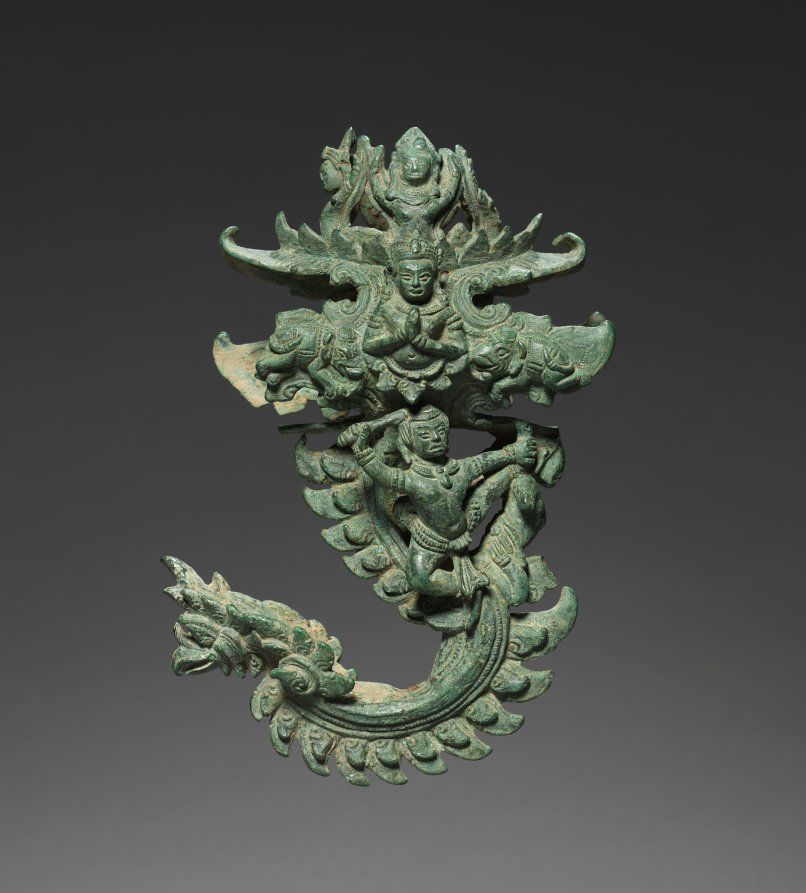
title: Palanquin Hook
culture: Cambodia, probably Angkor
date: 1175–1230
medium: bronze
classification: Sculpture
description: When members of the royal family or priesthood traveled in a public festival procession or to a temple to make offerings or participate in a ceremony, they would be carried in a palanquin, or a covered litter. Portable objects of veneration, such as bronze images or a sacred fire, were also carried on palanquins. The palanquins had wooden poles, hanging seats or raised platforms, and bronze fittings cast in intricate forms and gilt, lending the palanquins a sumptuous quality. This hook once supported a bronze ring from which hung a seat, like a hammock or swing. A wooden pole would have passed through the hollow socket at the top and was carried on the shoulders of bearers. The hook segment ends in the face of a garuda, a man-eagle with a prominent beak, stylized wings, and feathers. Figures indicative of devotion and success, including pairs of elephants, crown the fitting.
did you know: In the middle of the hook, a figure holding a sword in one hand and his extended leg in the other is in a dance pose expressing vigorous attack.